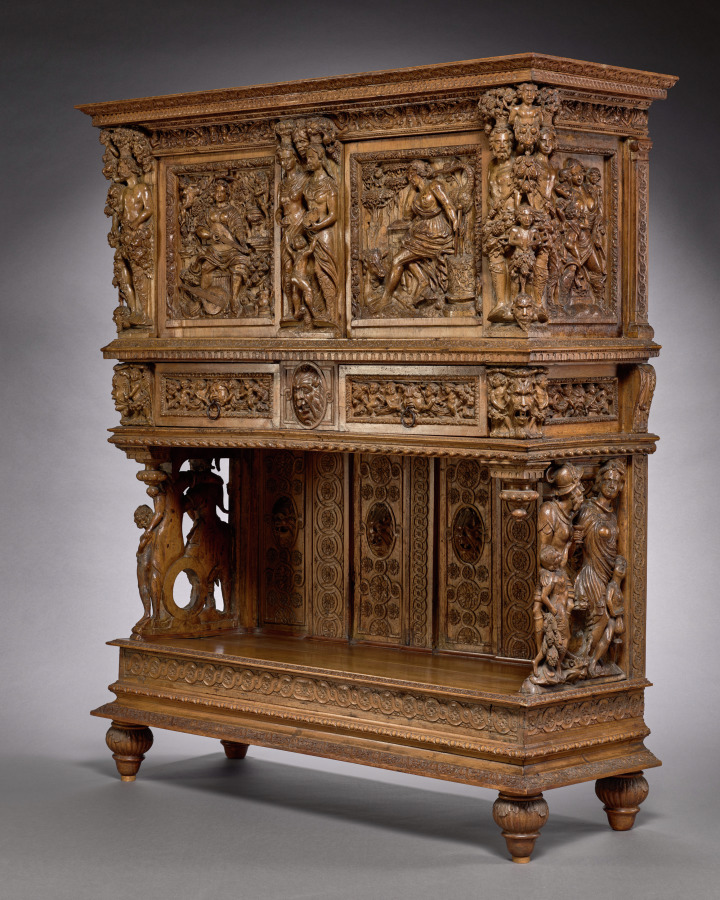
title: Dressoir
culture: France, Burgundy, 16th century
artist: style of Hugues Sambin (French, 1518–c. 1601)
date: mid 1500s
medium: walnut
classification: Furniture and woodwork